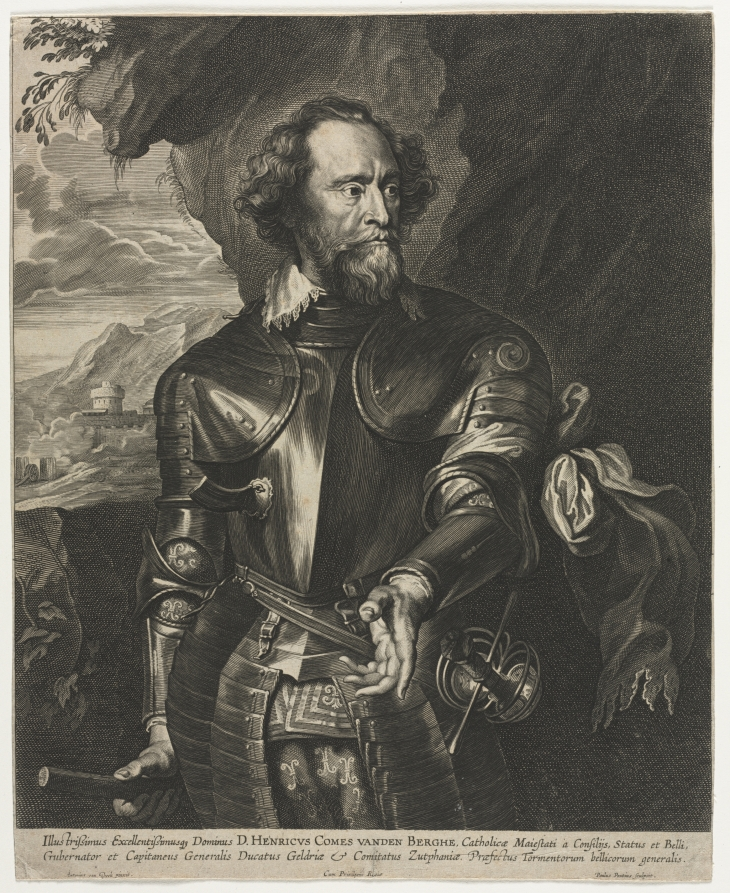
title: Portrait of Henry, Count van den Berghe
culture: Flanders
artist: Paulus Pontius (Flemish, 1603–1658)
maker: after Anthony van Dyck (Flemish, 1599–1641)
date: 1600s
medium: engraving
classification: Print